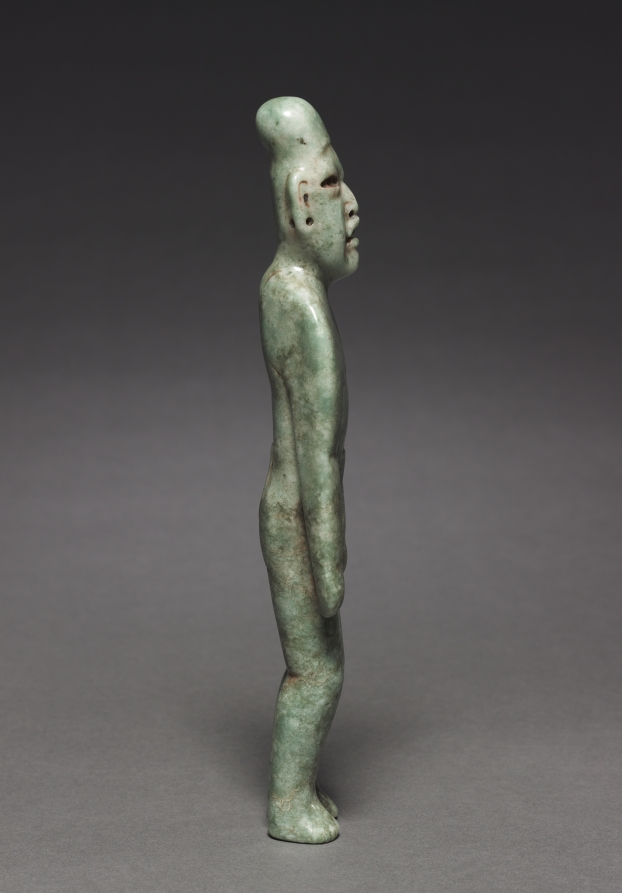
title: Standing Figurine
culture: Mesoamerica, Mexico, Olmec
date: 1900s(?)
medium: polished jadite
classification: Sculpture